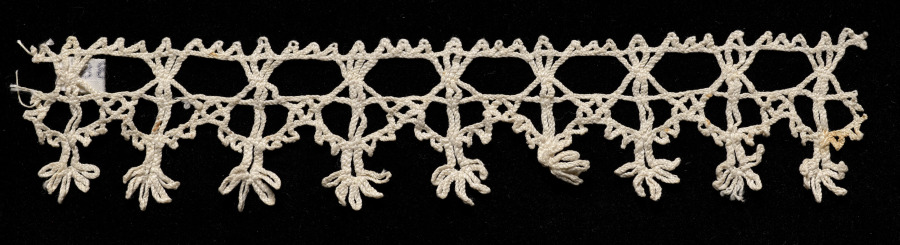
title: Lace Edging of Points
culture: Italy, Venice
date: 1540–60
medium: Bobbin lace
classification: Lace